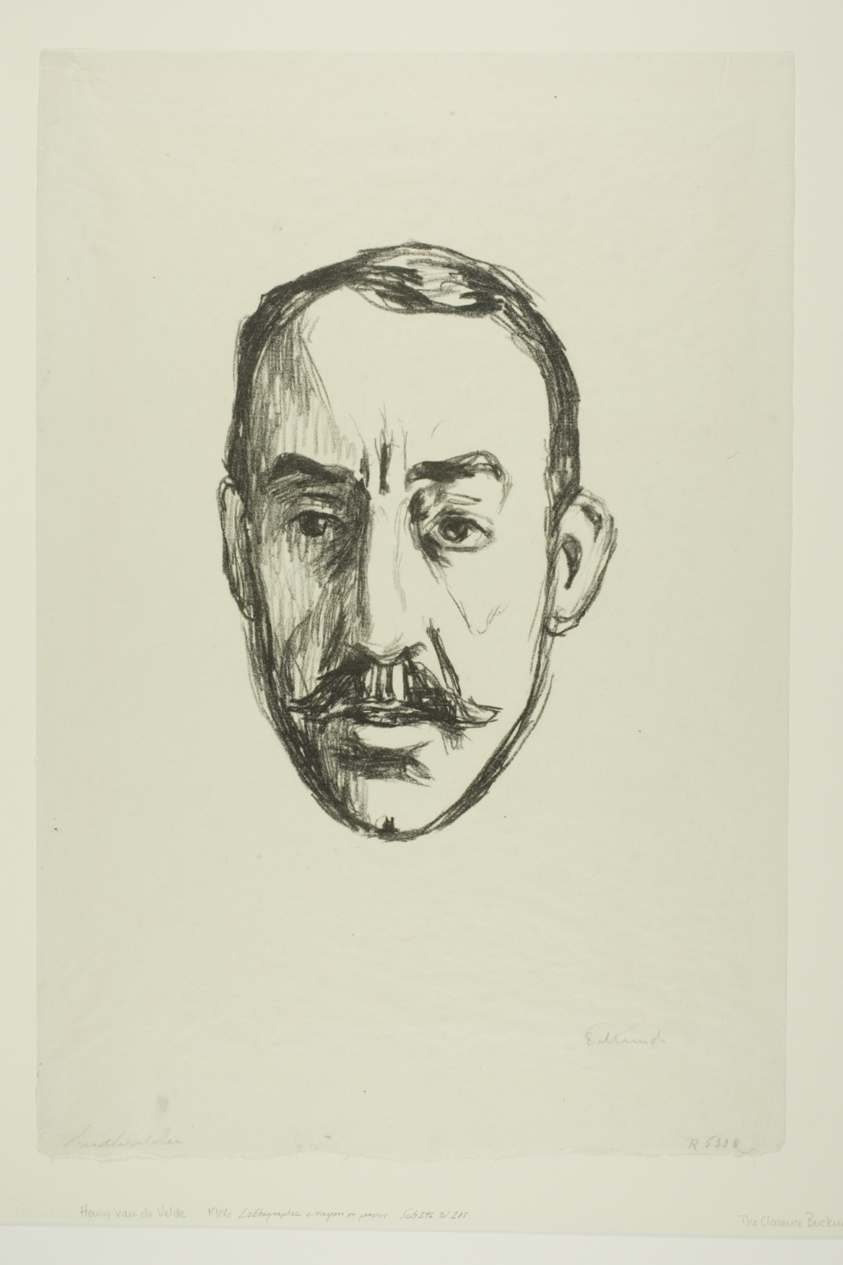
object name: Print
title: Henry van de Velde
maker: Edvard Munch (Norwegian, 1863-1944)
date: 1906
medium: Lithograph on cream Japanese paper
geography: Norway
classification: lithograph; print; prints and drawing